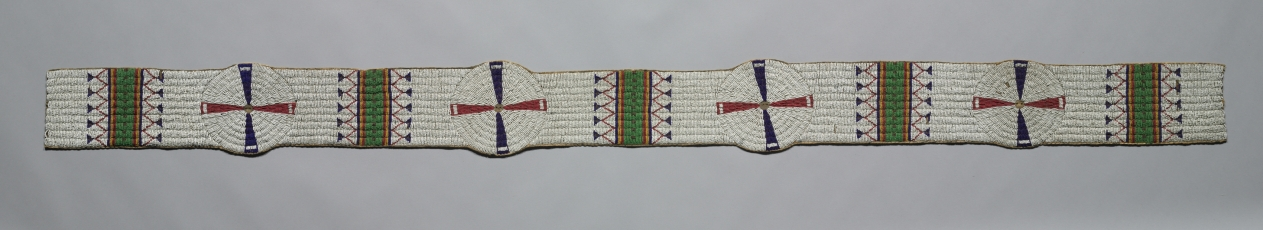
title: Blanket Strip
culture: Native North America, Plains, Tsitsistas (Cheyenne)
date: c. 1900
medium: Native-tanned hide, glass beads, metal beads, sinew thread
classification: Leather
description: The animal-hide robes basic to Plains attire were often ornamented with quilled or beaded strips, which also were stitched to the blankets that replaced robes. This beaded example carries the cross-in-a-circle motif that symbolizes the world, the four directions, and the sacred center, concepts central to Plains worldviews. In the 1932 words of Black Elk, the Oglala Lakota (Sioux) holy man, “[T]he power of the world always works in circles. . . . The flowering tree was at the center of the hoop, and the circle of the four quarters nourished it. . . . Everything the power of the world does is done in a circle.”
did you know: This beaded strip was stitched to a hide or a blanket.